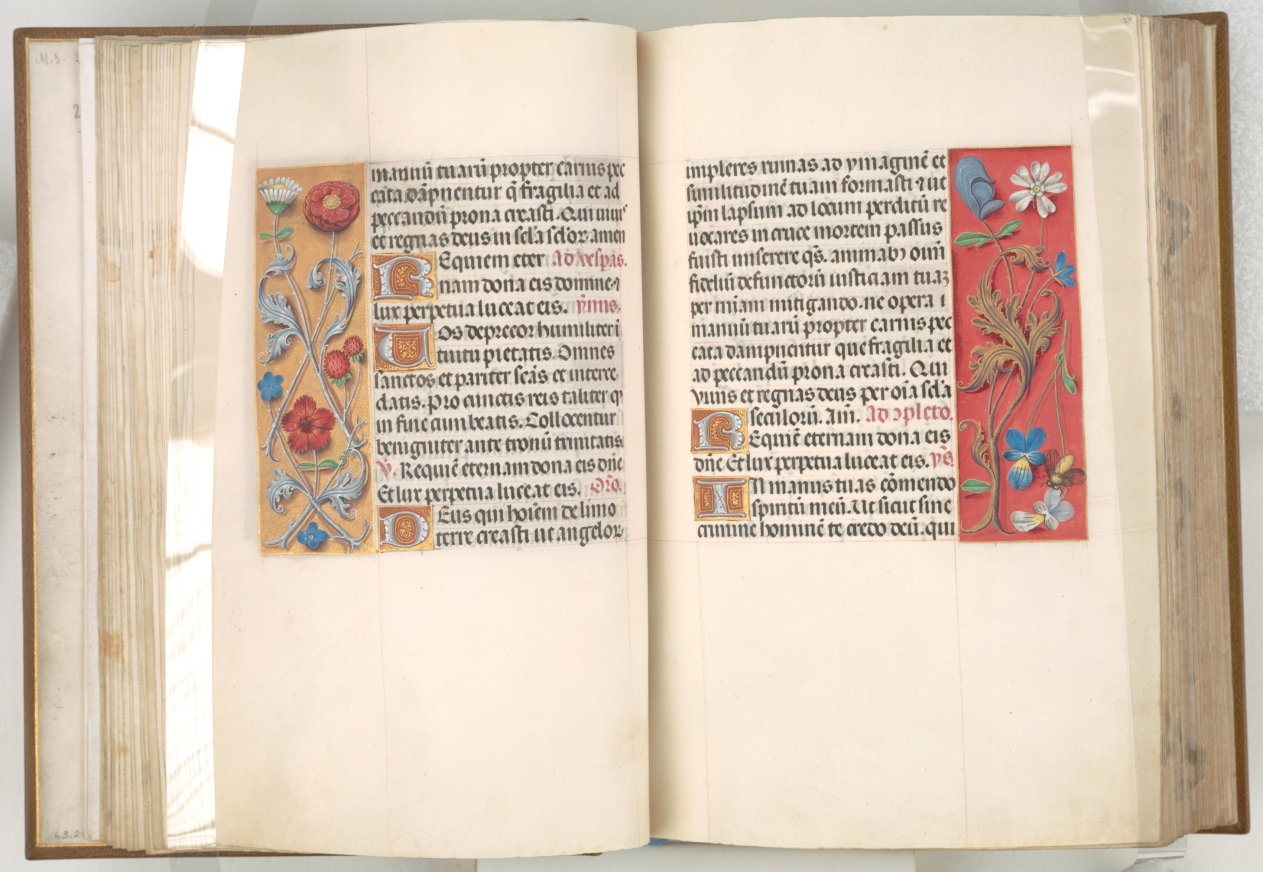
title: Hours of Queen Isabella the Catholic, Queen of Spain: Fol. 28v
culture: Flanders, Ghent and Bruges, late 15th century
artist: Master of the First Prayerbook of Maximillian (Flemish, c. 1444–1519)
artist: and Associates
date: c. 1500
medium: ink, tempera, and gold on vellum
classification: Bound Volume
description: A great lover of Flemish art, Queen Isabella treasured her many devotional books. This deluxe manuscript was created for her private devotions by highly organized and distinctly talented manuscript painters active in Ghent and Bruges. The Ghent-Bruges school represents the culmination of Flemish book painting, whose main features were the use of rich colors, illusionistic effects, a love of landscape, and a strong sense of visual narrative. Manuscripts produced by this circle of artists are renowned for their border decoration featuring a rich variety of realistically painted flowers, scrolling acanthus leaves, birds, and butterflies.